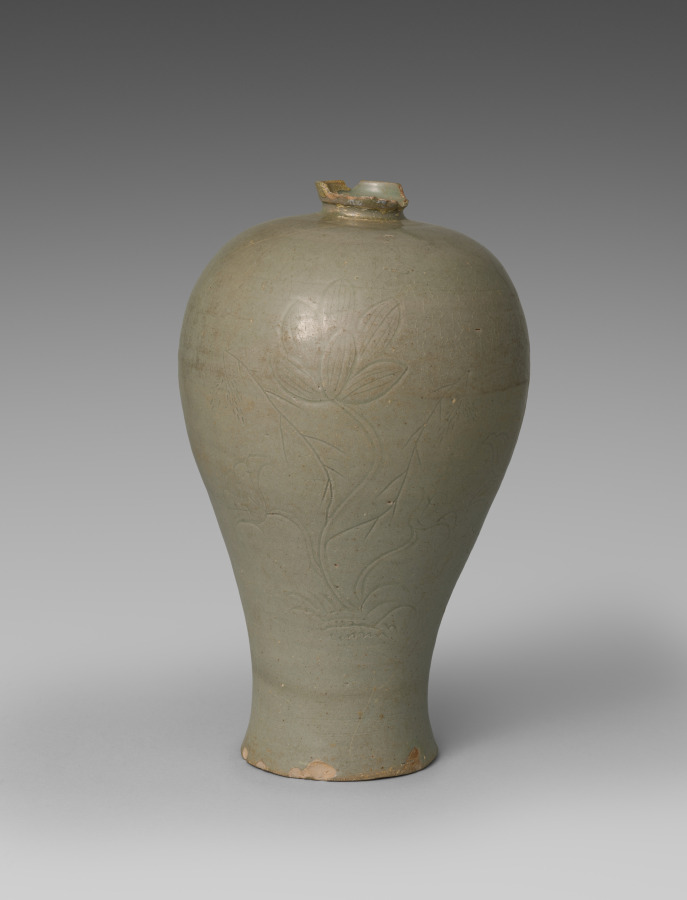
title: Prunus Vase with Incised Peony Design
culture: Korea, Goryeo dynasty (918–1392)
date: 1100s-1200s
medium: celadon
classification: Ceramic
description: As early as the seventh century, the practice of drinking tea and wine became an important part of elite culture in Korea. Once used to store alcoholic beverages, this type of vase features a wide body followed by a sharply rounded shoulder, a short neck and a small opening. Most of the remaining examples no longer have a lid, but originally it may have had a lid that not only covered the opening, but also served as a cup.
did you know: Prunus vases are often believed to contain a branch of plum blossoms, but recent researches reveal that these vases with a lid also were used to contain cooking liquid such as sesame oil.